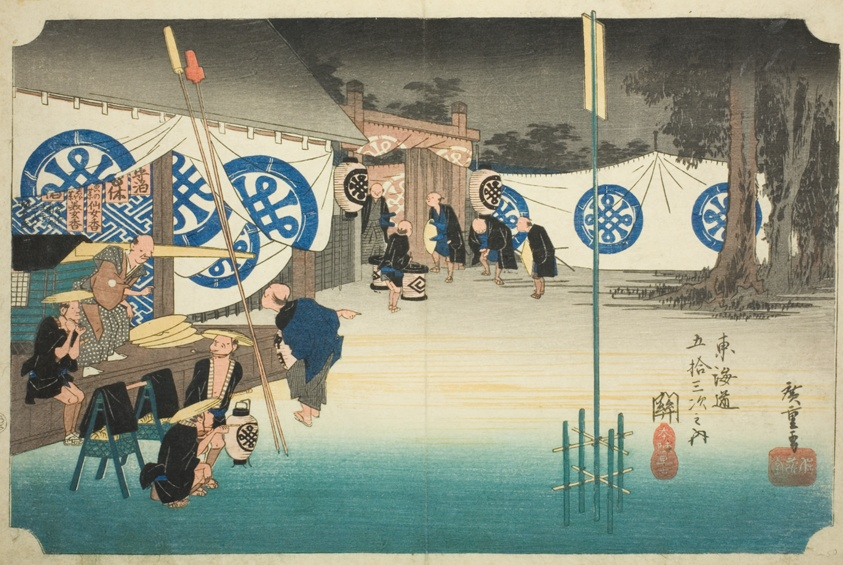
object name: Print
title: Seki: Early Departure from the Main Camp (Seki, honjin hayadachi), from the series "Fifty-three Stations of the Tokaido (Tokaido gojusan tsugi no uchi)," also known as the Hoeido Tokaido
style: Japanese (culture or style)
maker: Utagawa Hiroshige 歌川 広重; Japanese, 1797-1858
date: c. 1833/34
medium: Color woodblock print; oban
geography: Japan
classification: woodblock print; print; asian art